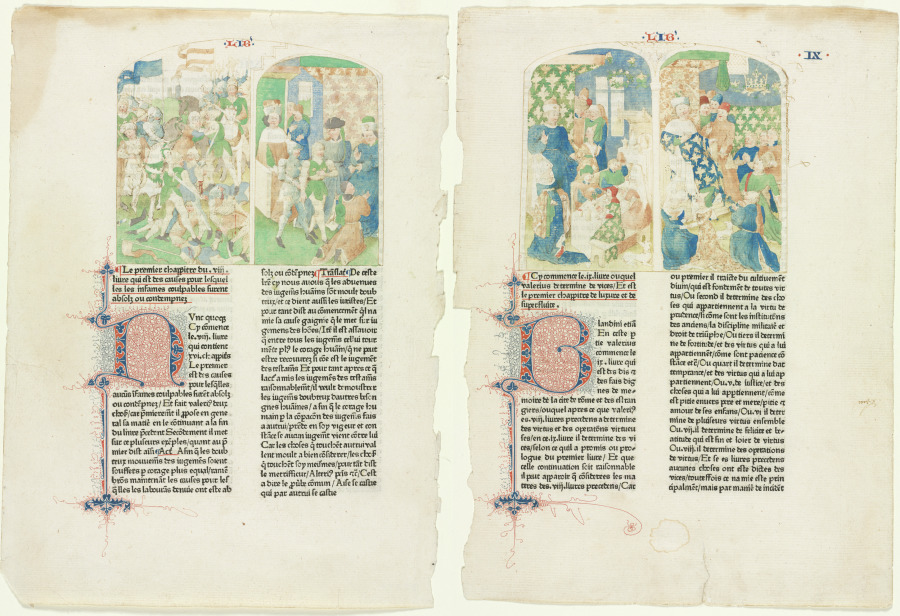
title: Opening Pages from Valerius Maximus's Facta et dicta memorabilia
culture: Flanders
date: c. 1476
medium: pen and brown ink, watercolor, and gouache; framing lines in brown ink (around image), with letterpress text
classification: Drawing